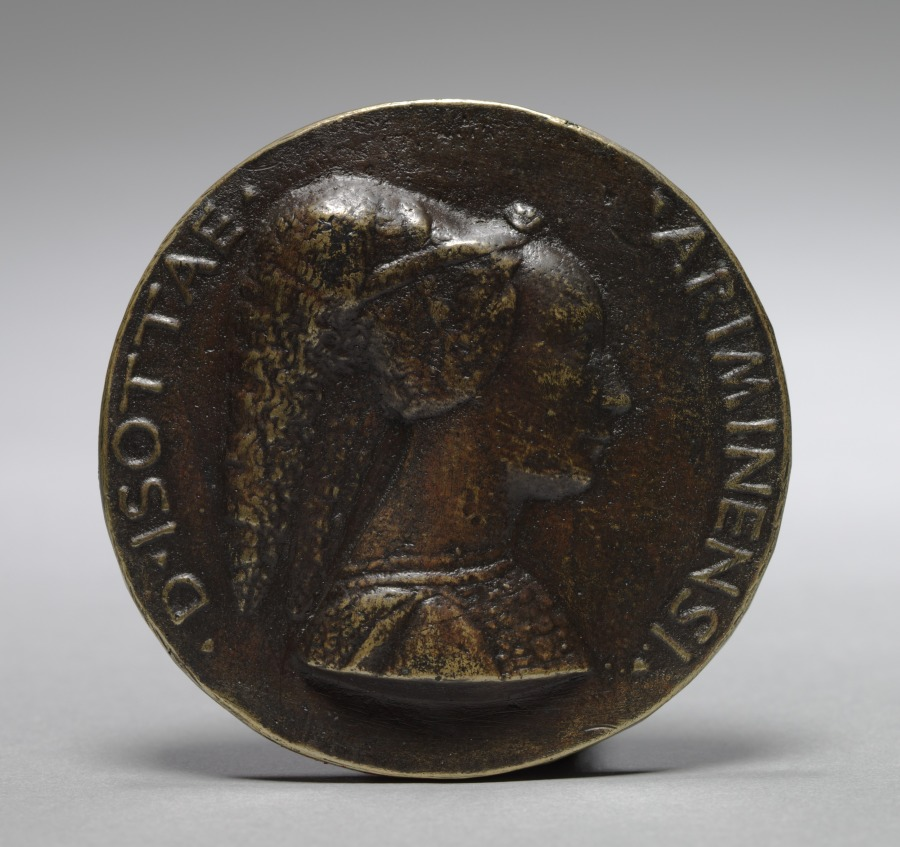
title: Medal of Isotta degli Atti da Rimini (obverse) and (reverse)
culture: Italy, 15th century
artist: Matteo de' Pasti (Italian, 1420–1467/68)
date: 15th century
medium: bronze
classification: Sculpture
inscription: obverse: "D ISOTTAE ARIMINENSI"